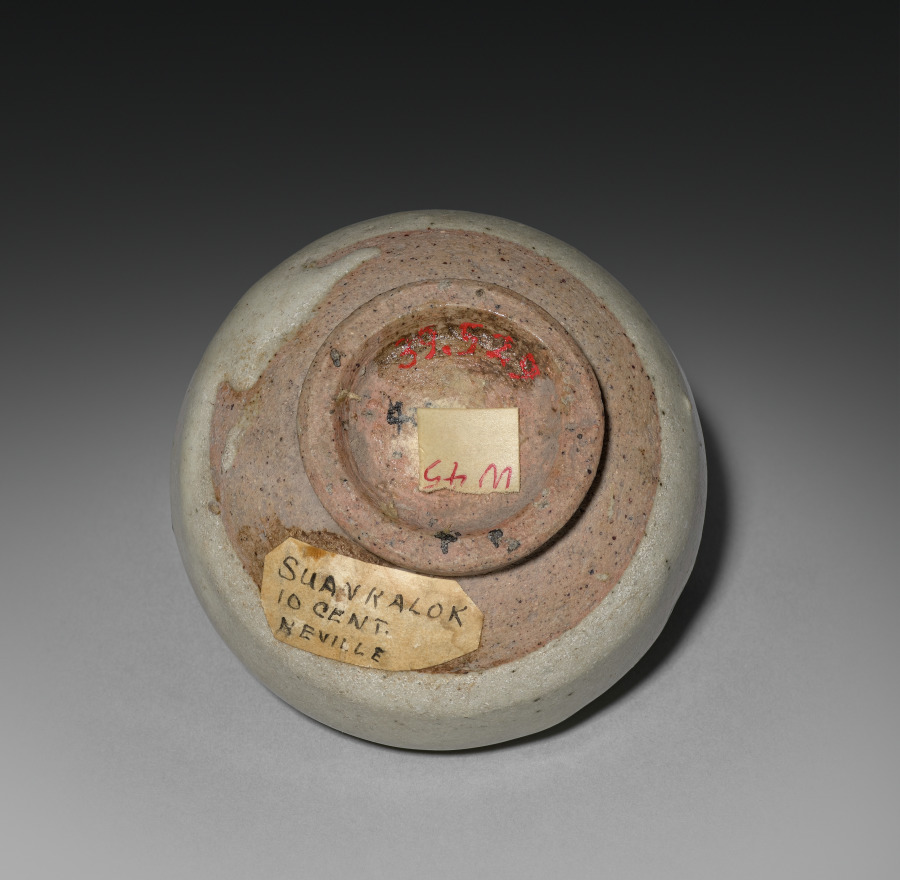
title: Bottle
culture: Siam, Sawankhalok ware, late 13th-14th Century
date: late 1200s-1300s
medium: stoneware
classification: Ceramic